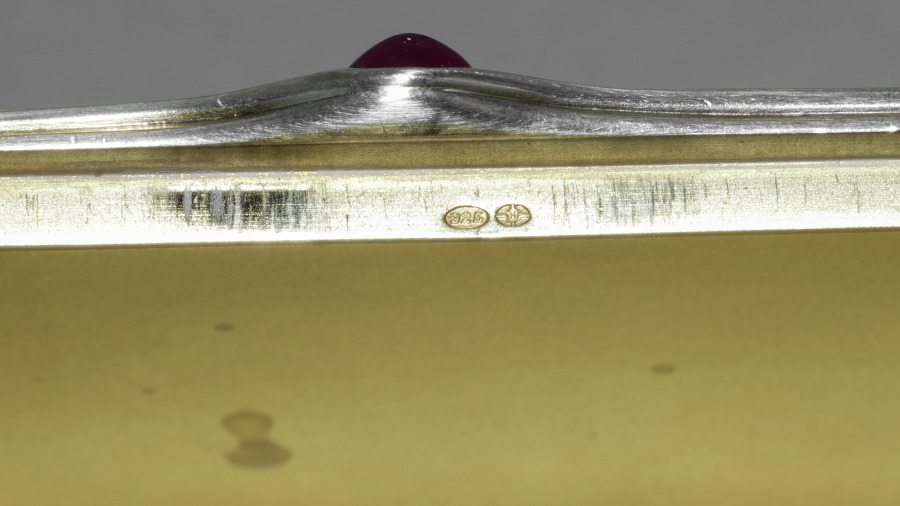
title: Cigarette Case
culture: Russian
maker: House of Fabergé (Russian, 1842–1918)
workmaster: August Hollming (Finnish, 1854–1913)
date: 1911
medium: Silver, ruby, textile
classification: Silver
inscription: Signed with initials of the workmaster August Hollming (active 1880-1913)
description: Fabergé offered variations of a cigarette case model such as this example, using different materials, surface treatments, and ornamentation. Accommodating individual clients’ wishes, the firm would also add a family insignia or additional decoration. The finely ridged surface demonstrates the superb handling of the precious metal by August Hollming, a Finnish master who worked for Fabergé in Saint Petersburg.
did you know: The cigarette case also includes a compartment for a match striker.